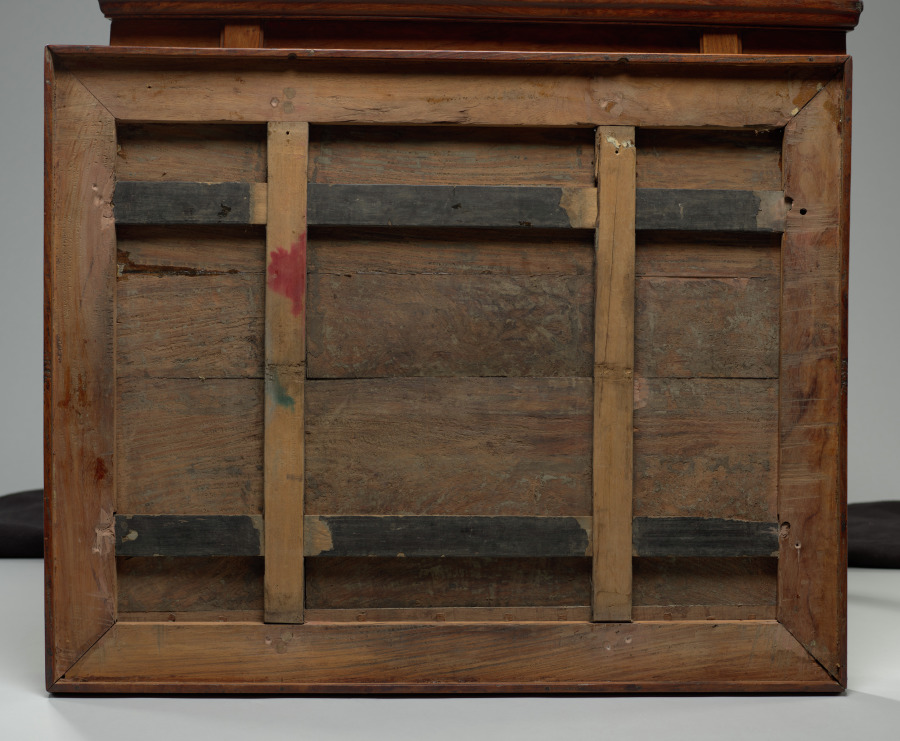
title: Game Table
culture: China, Ming dynasty (1368-1644) - Qing dynasty (1644-1911)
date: 1600s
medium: Rosewood (huanghuali)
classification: Furniture and woodwork